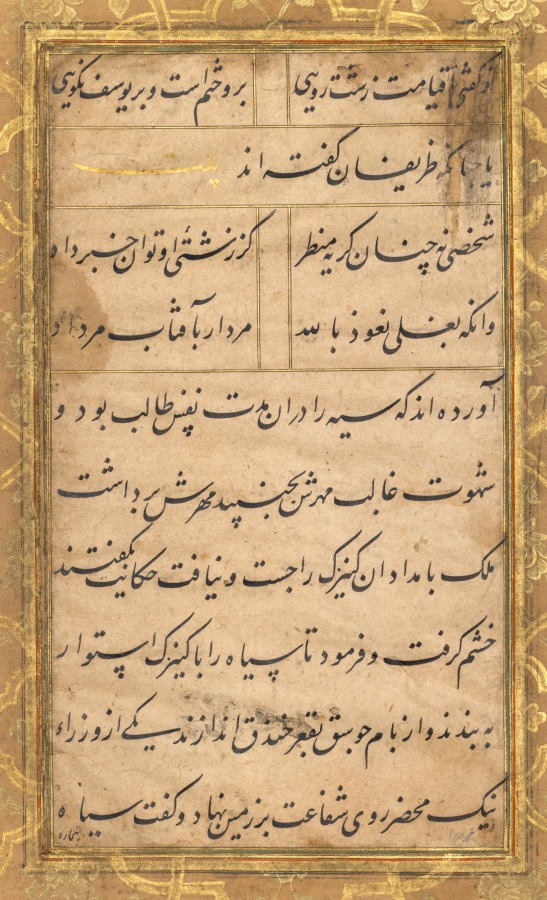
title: Illuminated folio (verso) from a Gulistan (Rose Garden) of Sa'di (c. 1213–1291)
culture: Iran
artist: Sultan 'Ali al-Mashadi (Iranian, 1430–1520)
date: calligraphy: c. 1475–1500; border: c. 1550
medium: Gum tempera, ink, gold, and silver on paper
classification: Manuscript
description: The border scene is set in a magical forest bursting with blossoms. At the top, a winged lion chases a winged deer, who is caught in the bottom border. The imagery of a lion biting down on its prey dates from the Achaemenid period in Iran (550–330 BCE) and references the valor of the king. A fox scurries off to the right. The verse is written in the Persian language using nastaliq script. Sultan ‘Ali Mashadi was widely renowned for perfecting the nastaliq script, and his calligraphy was a model for many followers across the Islamic world.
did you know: Meaning “rose bush” in Persian, the Gulistan is a collection of anecdotes in both verse and prose.